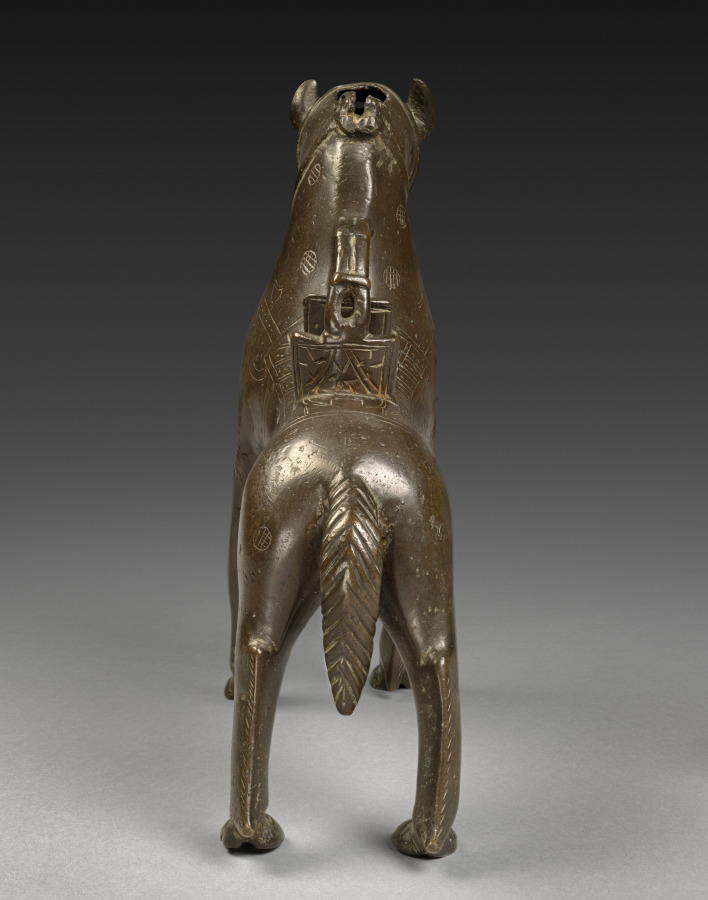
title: Aquamanile: Saddled Horse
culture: North Germany, Lower Saxony (?), 14th century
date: c. 1250–1300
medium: copper alloy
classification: Sculpture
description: Aquamanilia, from the Latin aqua meaning water and manus meaning hands, were hollow cast vessels used for hand washing. Although originally intended for liturgical use they became a common sight in the homes of the nobility in the 1200s and 1300s. Often filled with scented water, these vessels were used to wash hands just before and after eating a meal. An accompanying catch basin would have caught the water as it was being poured. Here we see a proud and alert dappled gray warhorse, highly prized in the medieval period. The saddled but riderless form is rare; other popular aquamanilia include lions, dragons, griffins, and human heads.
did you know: The pattern of crosshatched circles on the surface suggests that the horse is a dappled gray warhorse, a prized possession in the period.